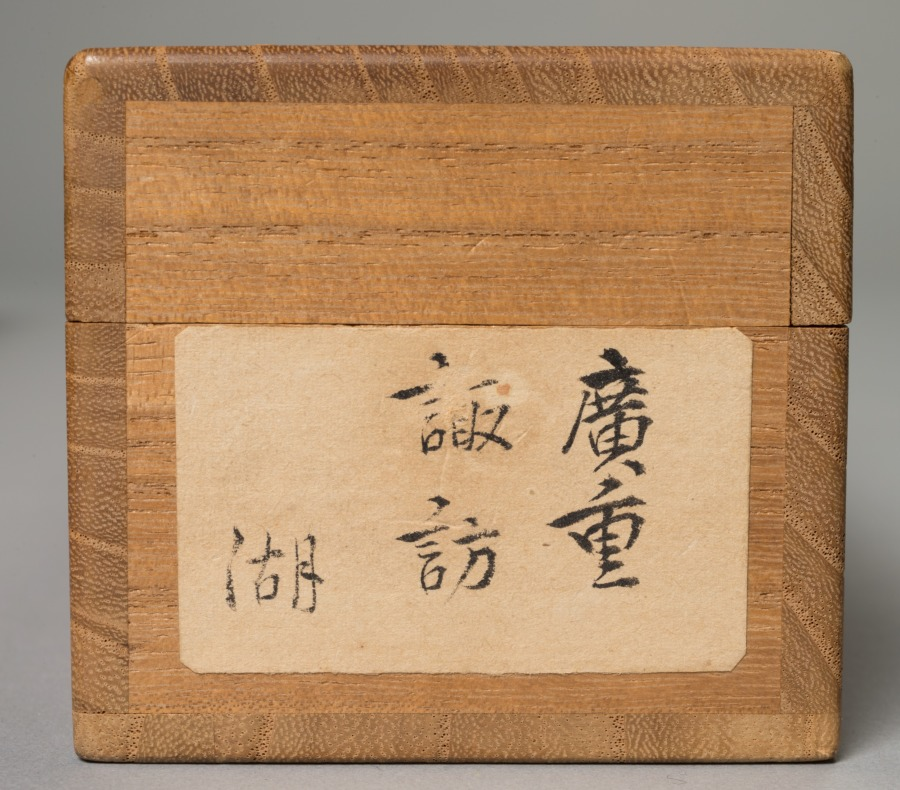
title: Lake Suwa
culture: Japan, Edo period (1615–1868)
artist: Utagawa Hiroshige (Japanese, 1797–1858)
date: c. 1832–58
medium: hanging scroll; ink and color on silk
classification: Painting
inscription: 立斎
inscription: 廣重